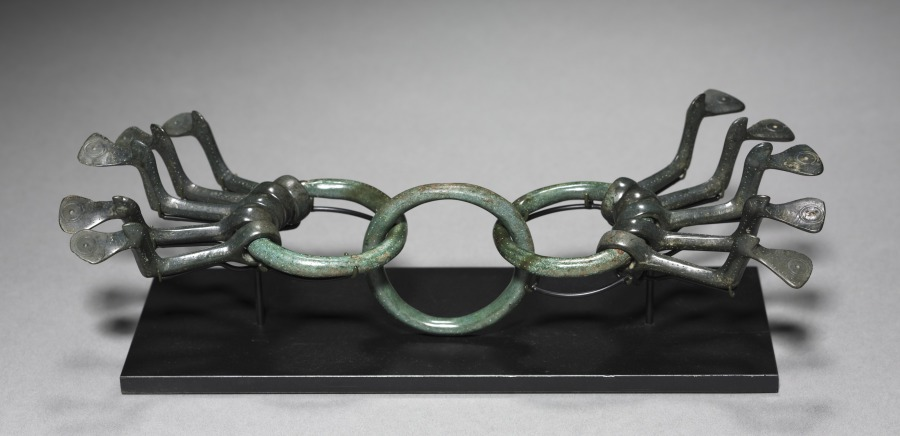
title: Cauldron Ornament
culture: Central Europe, Bronze Age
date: c. 1200 BCE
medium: bronze with iron rivets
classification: Metalwork